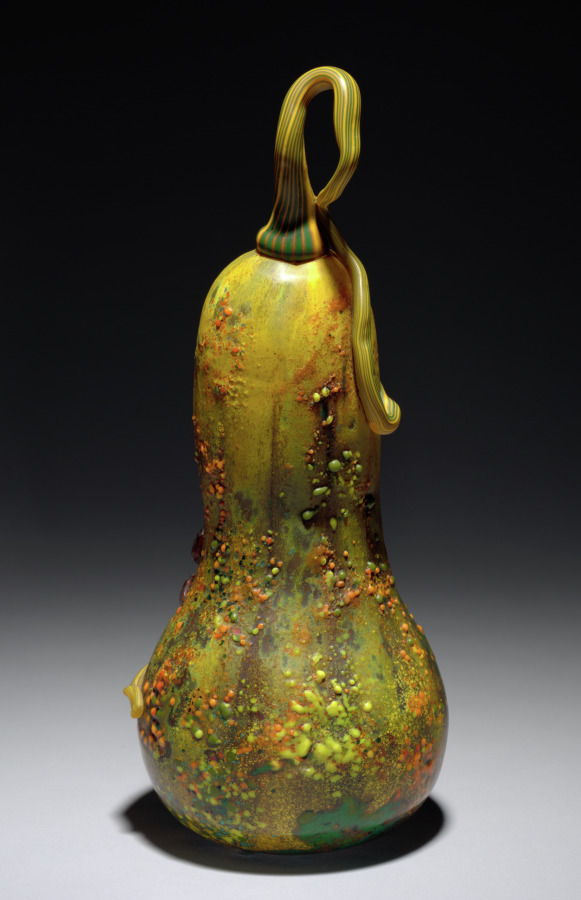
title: Vase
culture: France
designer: Daum Frères (French, founded 1875)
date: c. 1910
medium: Blown, cast, and vitrified glass with applied, wheel-engraved decoration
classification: Glass